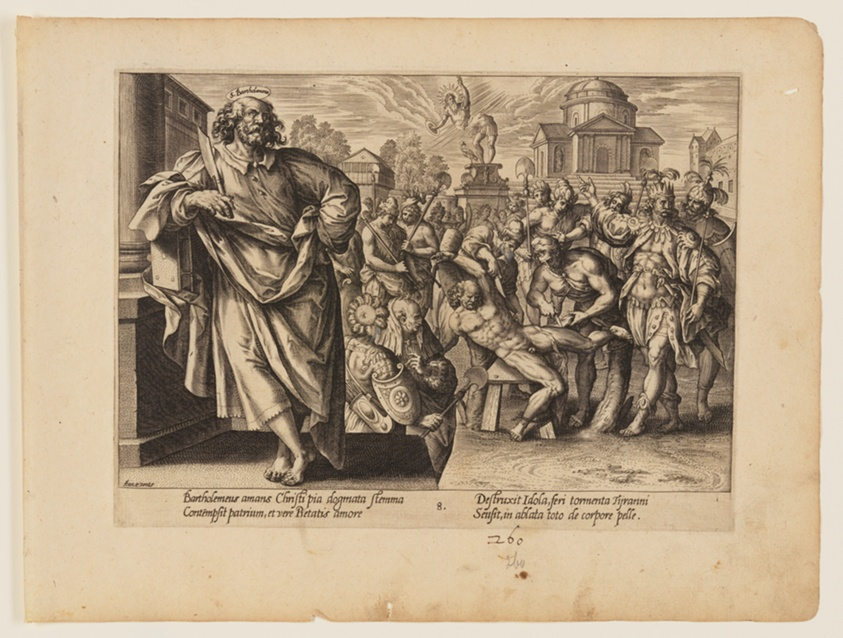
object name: Print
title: The Martyrdom of St Bartholomew, from The Martyrdom of Christ and the Apostles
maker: Hendrick Goltzius (Dutch, 1558–1617); after Maarten de Vos (Flemish, 1532–1603); published Hieronymus Cock (Netherlandish, c. 1510–1570)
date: c. 1578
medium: Engraving on ivory laid paper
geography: Netherlands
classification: engraving; paper; print; prints and drawing